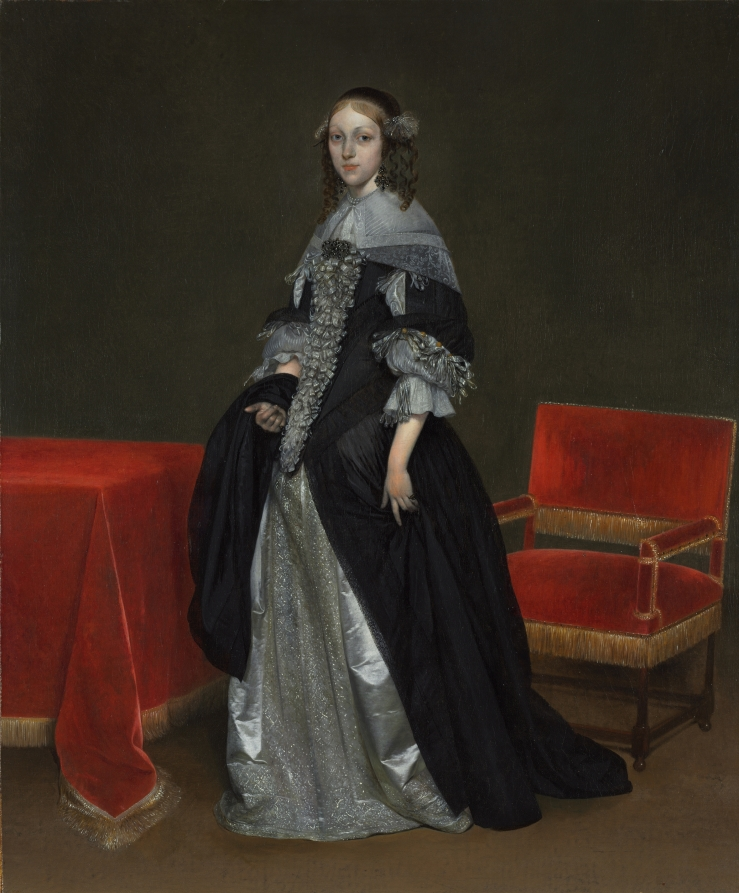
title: Portrait of a Woman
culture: Netherlands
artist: Gerard ter Borch (Dutch, 1617–1681)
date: c. 1665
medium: oil on canvas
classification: Painting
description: Every detail of his subject’s elaborate costume is skillfully recorded: glittering jewels, filmy lace, knots of ribbons, heavy black silk, and shimmering white satin. The ability to recreate satin’s luster was Gerard ter Borch’s particular trademark: he used fine flicks and sweeps of the brush, occasionally adding and wiping away tiny bits of paint to make the white fabric appear to shine. Ter Borch offset the profusion of costume detail by deliberately isolating the figure within a spare setting, allowing us to appreciate the woman’s cool composure. Although her identity is not known, she was undoubtedly a member of the wealthy Dutch elite.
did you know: The pair to this painting (in the National Gallery, London), depicts a man in equally fashionable dress.